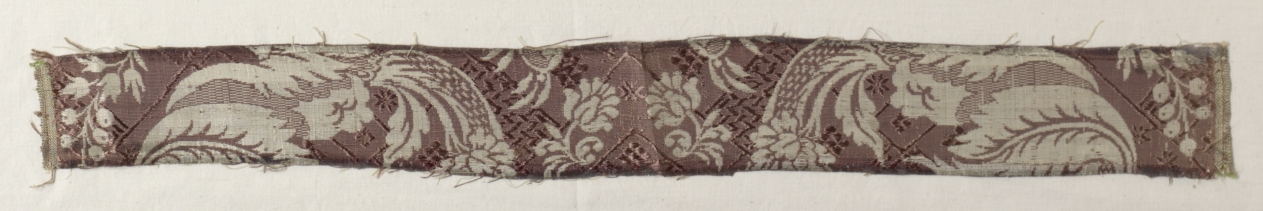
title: Length of Textile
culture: France or Italy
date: early 1700s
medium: silk with supplementary weft brocading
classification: Textile